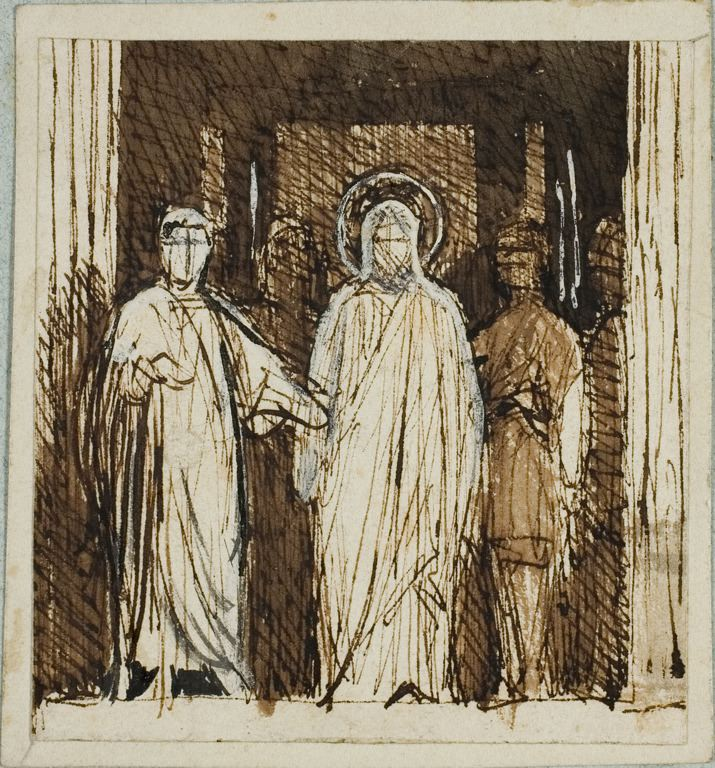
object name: Drawing and Watercolor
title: Christ with Pilate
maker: Dominique Papety (French, 1815-1849)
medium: Pen and brown ink and wash on ivory laid paper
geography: France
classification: prints and drawing; wash; pen and ink drawings; drawings (visual works)